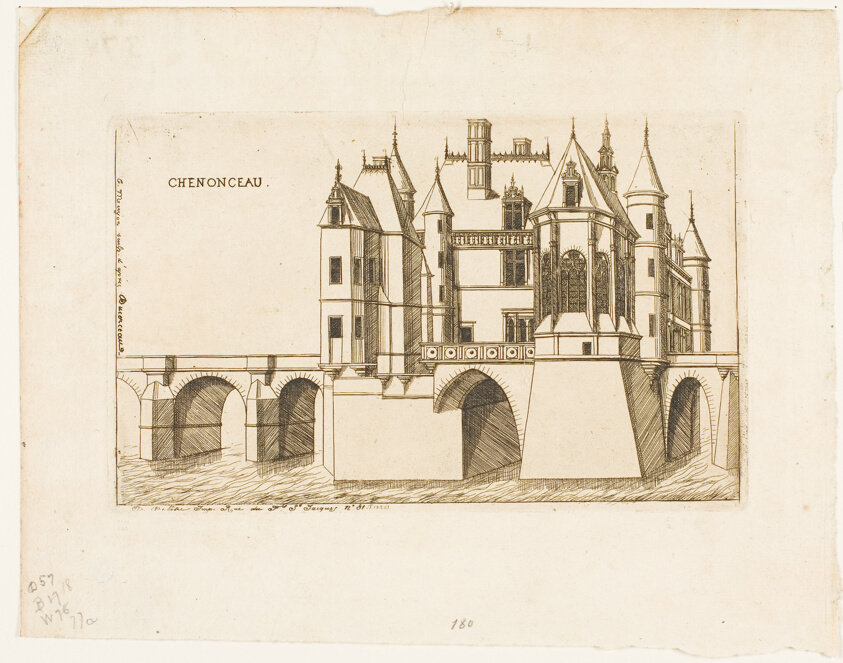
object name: Print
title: The Château of Chenonceau, no. 2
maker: Charles Meryon (French, 1821-1868); after Jacques Androuet du Cerceau, the Elder (French, c. 1515-1585); printed by Auguste Delâtre (French, 1822-1907)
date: 1856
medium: Etching on ivory laid paper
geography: France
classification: etching; print; prints and drawing